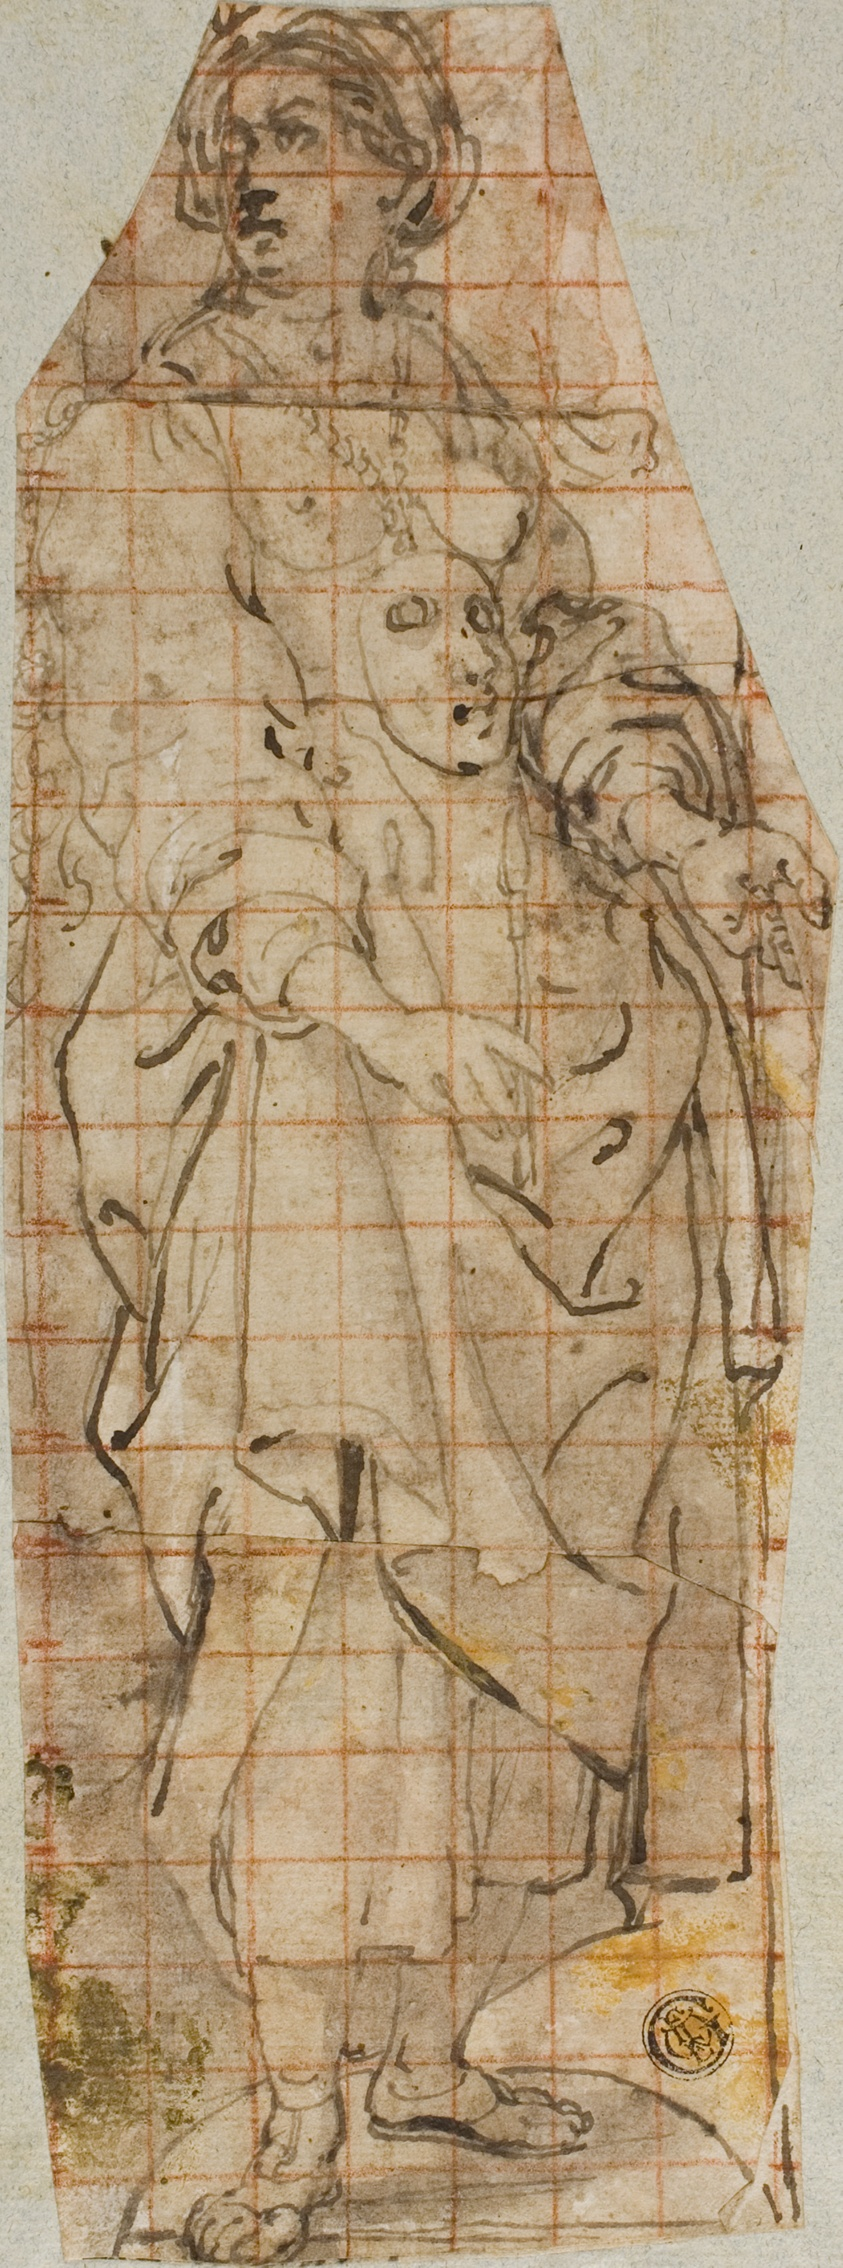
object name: Drawing and Watercolor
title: Allegory of Painting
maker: Andrea Lilio (Italian, 1555-1642)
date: c. 1600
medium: Pen and brown ink with brush and brown wash, squared in red chalk, on ivory laid paper, pieced and laid down on ivory laid paper and blue laid paper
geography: Italy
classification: pen and ink drawings; drawings (visual works); prints and drawing